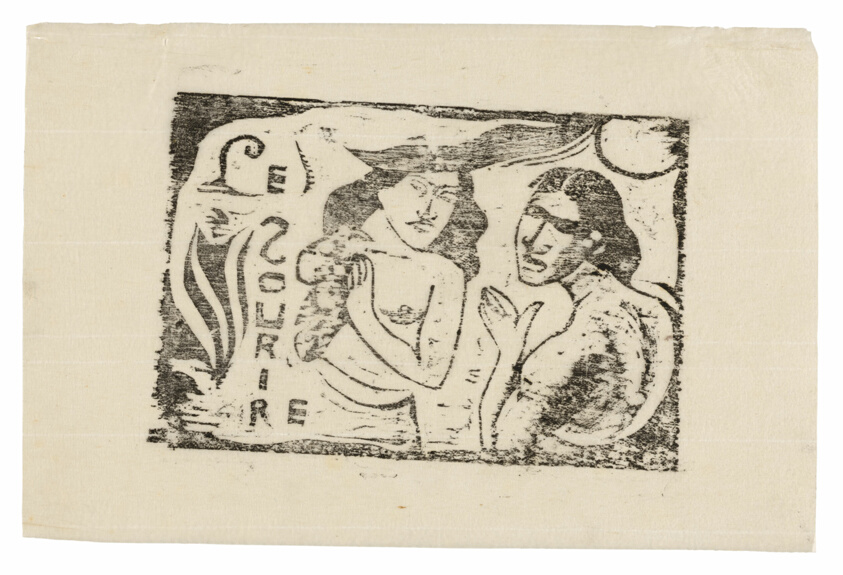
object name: Print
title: Two Women Chattering, headpiece for Le Sourire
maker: Paul Gauguin (French, 1848-1903)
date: 1900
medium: Wood-block print in black ink on thin ivory laid Japanese paper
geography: France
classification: woodcut; print; prints and drawing